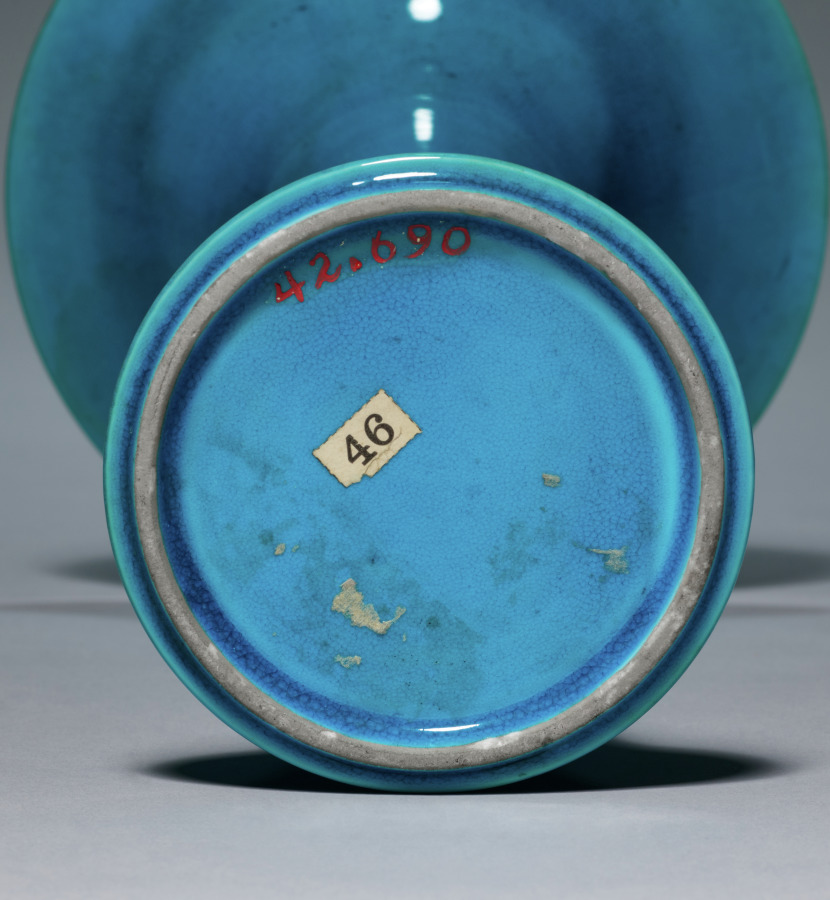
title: Beaker Vase in Form of Archaic Gu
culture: China, Jiangxi province, Jingdezhen kilns, Qing dynasty (1644-1911), Kangxi mark and reign (1662-1722)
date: 1662–1722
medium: porcelain with peacock-blue glaze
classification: Ceramic